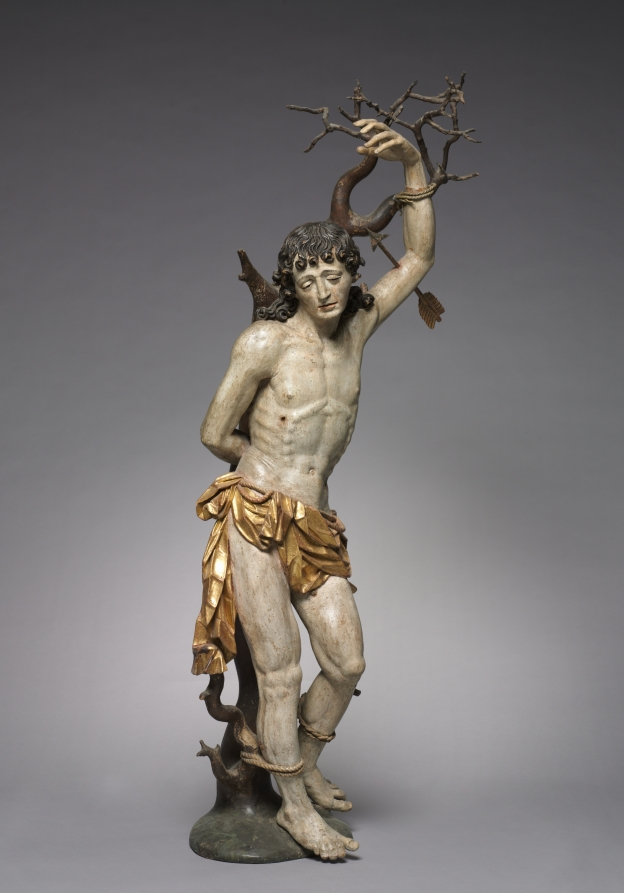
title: Saint Sebastian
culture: Germany, early 17th century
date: c. 1600–1620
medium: painted and gilded wood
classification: Sculpture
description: An early Christian saint and martyr, Sebastian was condemned to death by the Roman emperor Diocletian. Bound to a tree and shot with arrows, he survived—only later to be martyred by beating. This figure embodies the blend of stylistic influences that characterized German sculpture in the early 1600s. The graceful pose and anatomical naturalism of the legs indicate the influence of Italian Mannerism, while the crisp, stylized patterns of Sebastian’s hair and loincloth recall German Gothic works from the 1400s. The tree to which Sebastian is bound is an actual branch, shaped and refined to its present appearance.